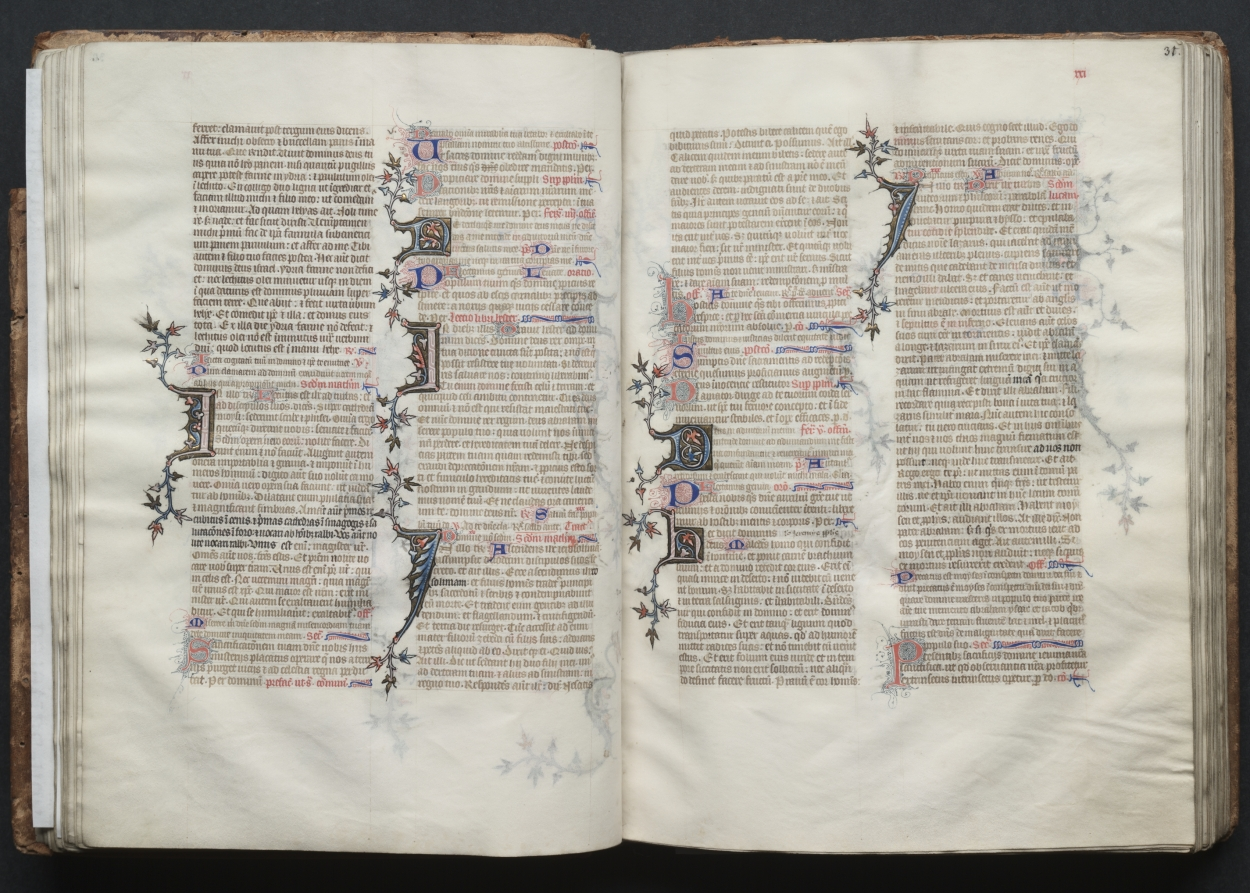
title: The Gotha Missal: Fol. 30v, Text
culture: France, Paris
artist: Master of the Boqueteaux (French)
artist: and Workshop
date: c. 1375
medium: ink, tempera, and gold on vellum; blind-tooled leather binding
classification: Bound Volume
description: The style and quality of this manuscript's decoration is typical of deluxe Parisian books made for aristocratic or royal patrons. Most of the book's decoration appears to be the work of the Master of the Boqueteaux, an artist active at the court of King Charles V (died 1380). His style was apparently shared by a number of book illuminators working in and around Paris. It is very possible that the Gotha Missal belonged to Charles V, but is not provable because the manuscript has no royal portraits and lacks a colophon. Given the book's magnificent decoration, however, it would seem that it was produced for a Valois prince, if not for the king himself. The manuscript receives its name from the German dukes of Gotha, its later owners.